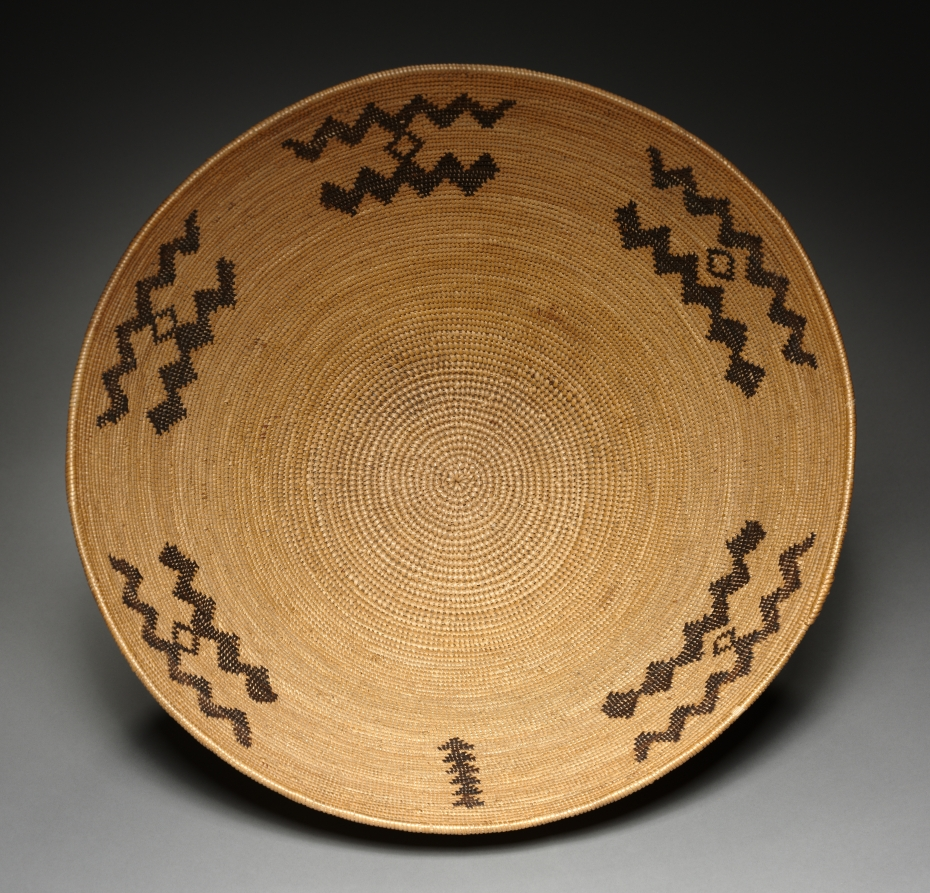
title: Food or Carrying Bowl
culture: California, Pala Band Luiseño, Pala Mission, late 19th - early 20th century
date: late 1800–early 1900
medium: coiled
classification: Basketry